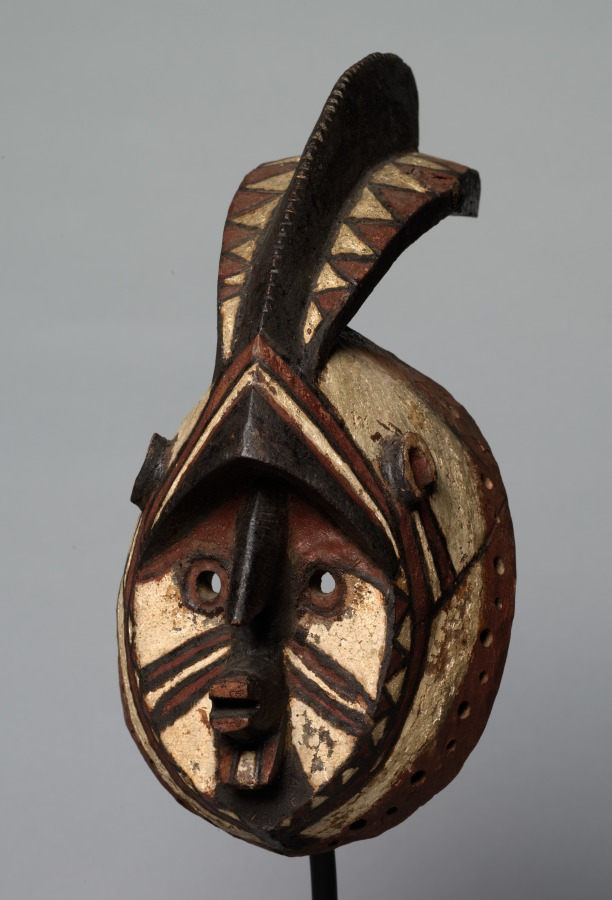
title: Mask (wan-balinga)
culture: Africa, West Africa, Burkina Faso, Mossi-style blacksmith-carver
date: early 1900s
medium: Wood and paint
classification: Mask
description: Only the farmers among the Mossi people employ masks. This mask’s proper name, wan-balinga, evokes a mythical figure who was the mother of the first Mossi ruler. Such masks are most typically worn and danced with on the occasion of the funeral of a male or female elder as escorts of the corpse to the grave. They also appear during annual memorial services that occur months after the actual burial, when all the deceased clan members are commemorated and honored.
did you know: This mask was worn and danced upon the death of an elder, escorting the corpse to the grave.